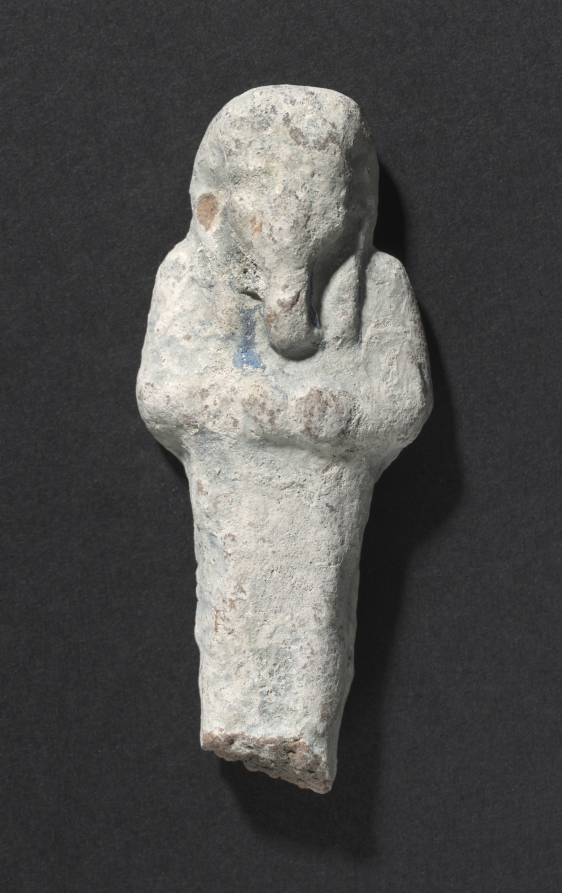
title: Shawabty of Ditamenpaankh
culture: Egypt, Late period (715–332 BCE), Dynasty 25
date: 715–656 BCE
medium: terracotta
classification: Funerary Equipment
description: High demand for shawabtys in the Late Period, a time when as many as 400 or more shawabtys were placed in the tomb with the deceased, gave rise to a specialized container for storing them: the shawabty box. This example is inscribed for the lady of the house, Ditamenpaankh, and was probably one of a pair originally made for her. The single-masted boat on the box's lid is perhaps an allusion to the pilgrimage of the deceased to the holy city of Abydos, the cult city of Osiris, king of the dead. The shawabtys inside are crude, mass-produced examples cast in an open mold. Made of terracotta, their blue paint imitates more costly shawabtys made of faience. As for the shawabty spell, it has been removed from its traditional location on the shawabty's front and relocated onto the sides of box, where it needed only to be written once, thus expediting production.